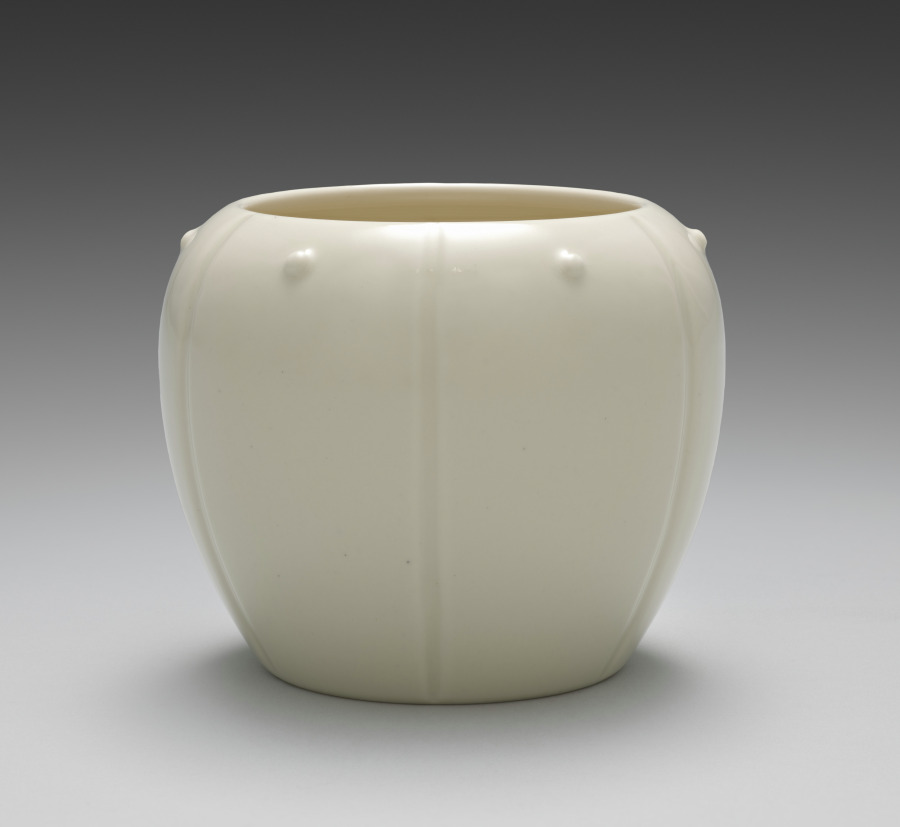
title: Container from Lit Charcoal and Ash Containers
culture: Japan, Meiji period (1868–1912)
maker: Seifū Yohei III (Japanese, 1851–1914)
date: 1893–1914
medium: One from a set of four containers; porcelain with molded design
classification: Ceramic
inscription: 清風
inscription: The storage box for this set is inscribed and impressed with seals.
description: The box lid for these six-lobed lit charcoal and ash containers, or hiire, identifies them as kōhakuji, another of Yohei III’s translucent cream colors over ivory clay bodies. One might translate the name as “lustrous pearl[–glazed ivory] porcelain.” A hiire was filled with ash with burnt coals at the center so that embers and tobacco ash could be discarded safely during a gathering. Each of the lobes on the containers has a round protrusion set below the rim. The studlike pattern is called ruiza. The term is also used to describe the pattern that rings the shoulder of some flower vases or metal kettles used in chanoyu.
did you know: The Seifu studio generally followed the standard practice in Japan for identifying the artist and object in box inscriptions.